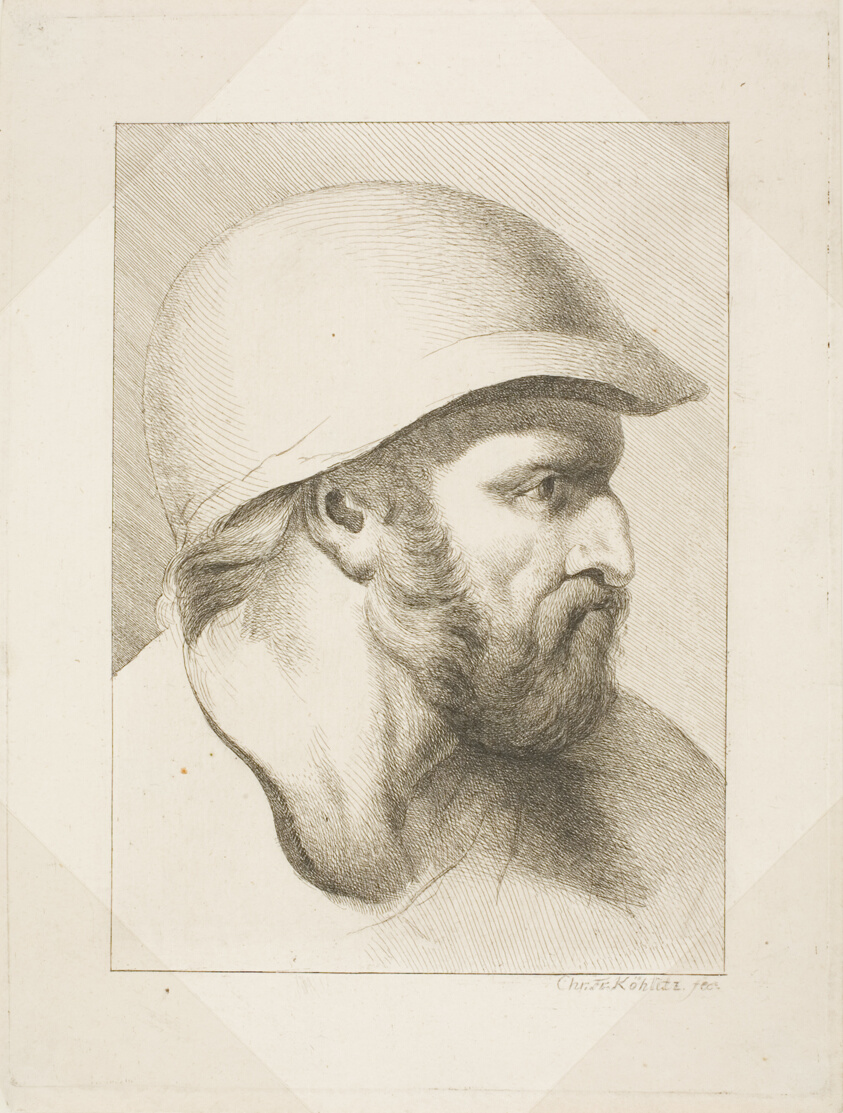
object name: Print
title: Bearded Male Head with Steel Helmet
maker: Christian Frederick Köhlitz (German, active 1770-1790)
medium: Etching on cream laid paper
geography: Germany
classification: etching; print; prints and drawing